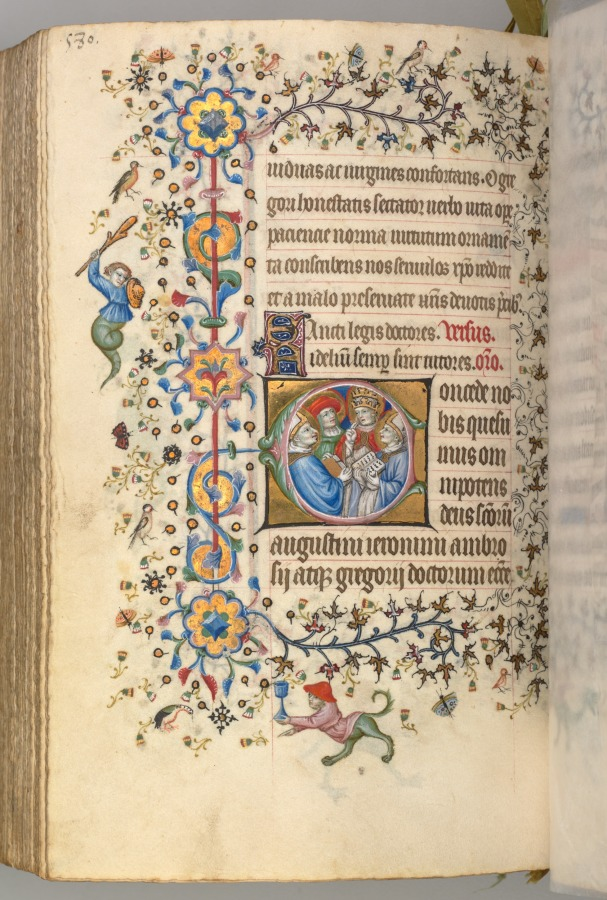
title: Hours of Charles the Noble, King of Navarre (1361-1425): fol. 284v, Four Doctors of the Church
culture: France, Paris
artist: Master of the Brussels Initials and Associates (French)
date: c. 1405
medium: ink, tempera, and gold on vellum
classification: Bound Volume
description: This precious volume was obviously highly prized by its owner, the French-born King of Navarre, who had his coat of arms painted on no less than twenty folios. Rather than directly commissioning this manuscript from a specific workshop, it seems that Charles the Noble acquired his book of hours -- perhaps ready-made for the luxury market -- while on a trip to Paris in 1404-05. A collaborative effort, six painting styles are evidenced within the pages of this codex, those of two Italians, two Frenchmen, and two Netherlanders. The painter who was responsible for the planning and decoration of the book, and who produced seventeen of the large miniatures, was a Bolognese artist known as the Master of the Brussels Initials. His principal assistant, responsible for most of the borders, was a Florentine who signed his name "Zecho" da Firenze on folio 208 verso.